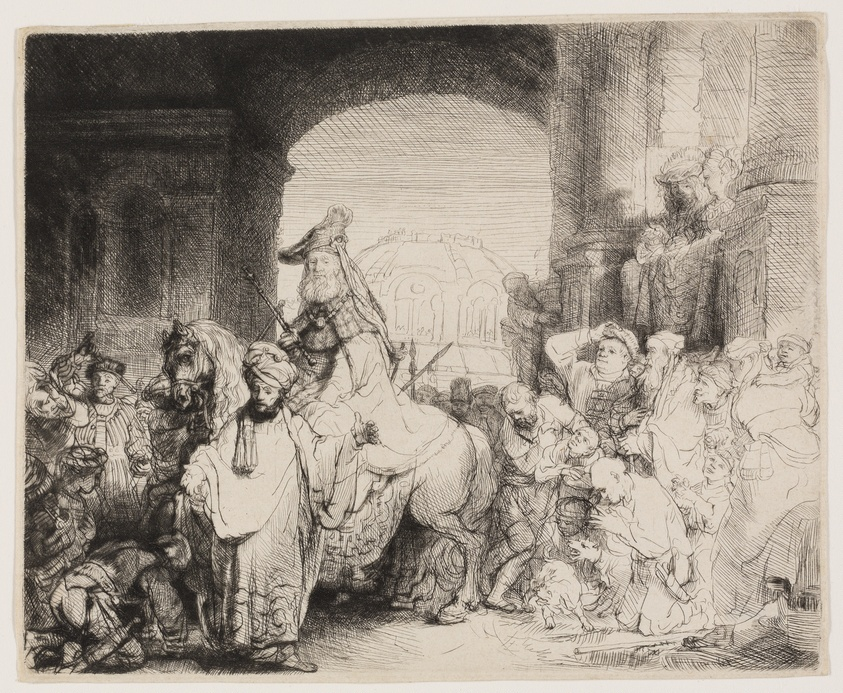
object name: Print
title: The Triumph of Mordecai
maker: Rembrandt van Rijn (Dutch, 1606-1669)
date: c. 1641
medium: Etching and drypoint on buff laid paper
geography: Holland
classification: etching; print; prints and drawing; paper; drypoint